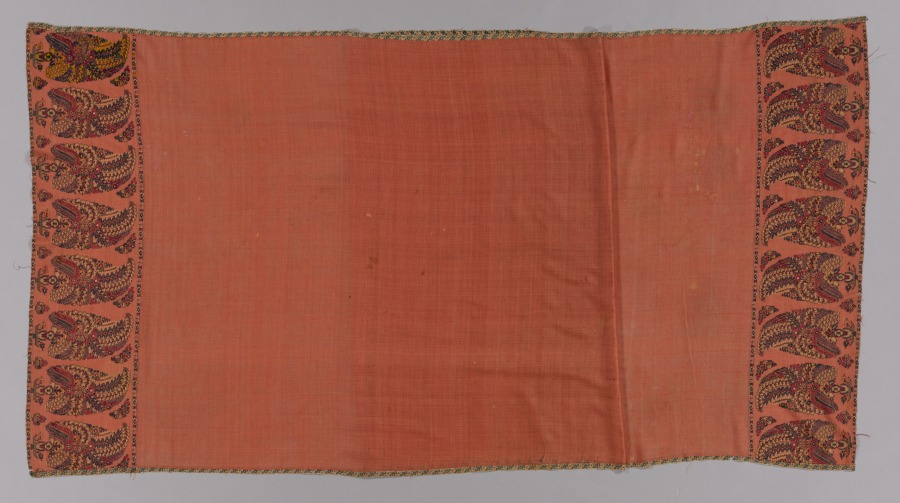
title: Apricot Long Shawl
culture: India, Kashmir, Afghan period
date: 1785–1800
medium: 2/2 twill tapestry weave, double interlocked; wool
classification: Textile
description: Artistic styles evolved with increasingly elaborate mosaic-like decoration during the 1800s to meet an insatiable European demand. Early shawls had plain fields with isolated plants in the end panels, which led to decorated side borders and vases of blossoming stems. Such flora was replaced by colorful, dense blossoms forming cone-shaped botehs, or paisleys, on trays. To this was added a gallery of small botehs and angular floral vines around a rich blue field with single botehs in the corners. Lightweight, supple, warm, and colorful, Kashmir shawls had no equal. Fine, soft goat-hair wool was woven in a 2/2 twill tapestry weave—the equivalent of painting with colored weft threads. Imitations woven in Paisley, Scotland, prompted the popular term paisley.